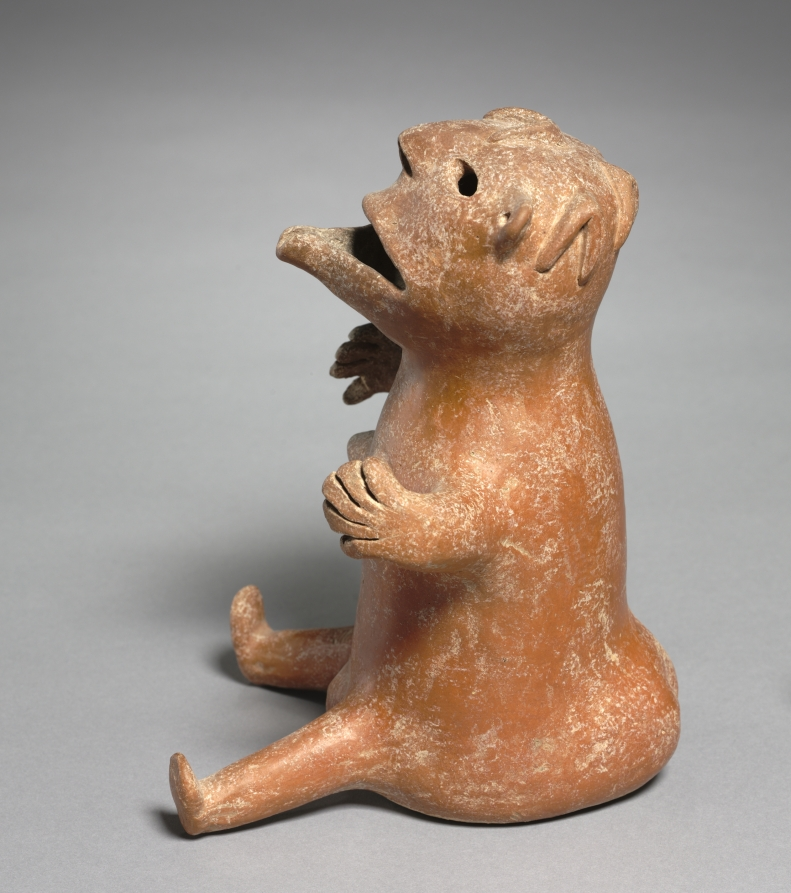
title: "Bear-Woman" Vessel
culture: Iran, Marlik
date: c. 1200–1000 BCE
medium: ceramic, earthenware, burnished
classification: Ceramic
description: The sexual features of this creature have been emphasized so as to guarantee fertility to the woman who drank from it.